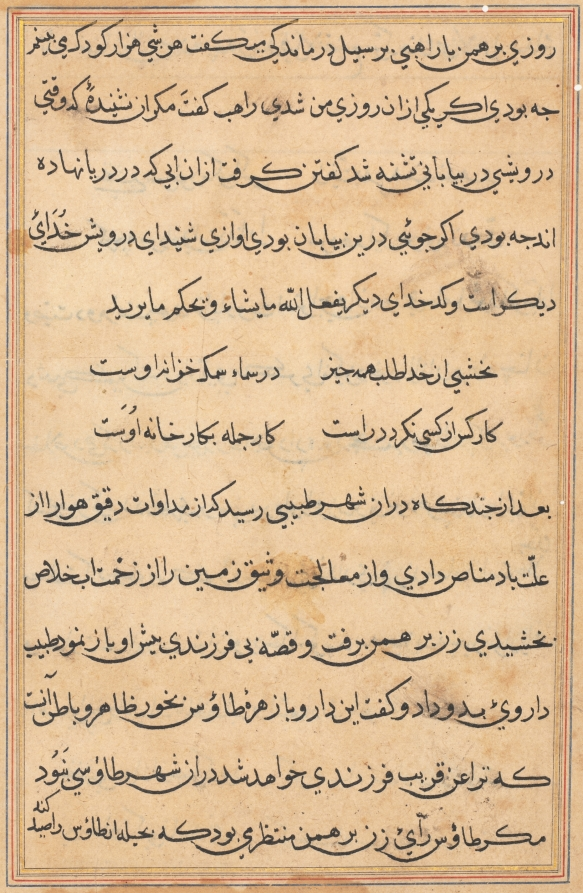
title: Page from Tales of a Parrot (Tuti-nama): text page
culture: Mughal India, court of Akbar (reigned 1556–1605)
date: c. 1560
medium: gum tempera, ink, and gold on paper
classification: Painting